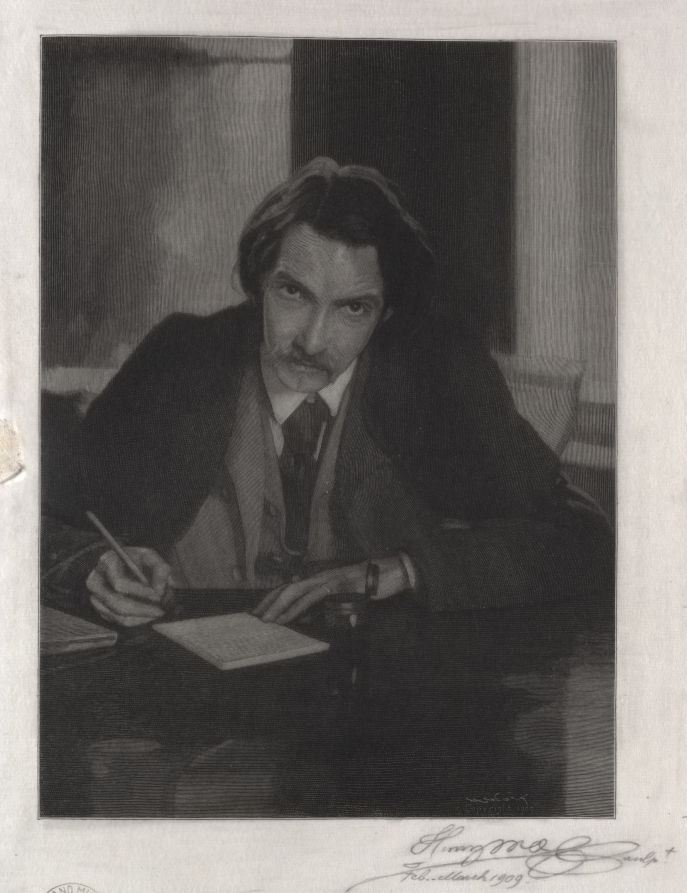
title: Robert Louis Stevenson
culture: America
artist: Henry Wolf (American, 1852–1916)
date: 1909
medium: wood engraving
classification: Print